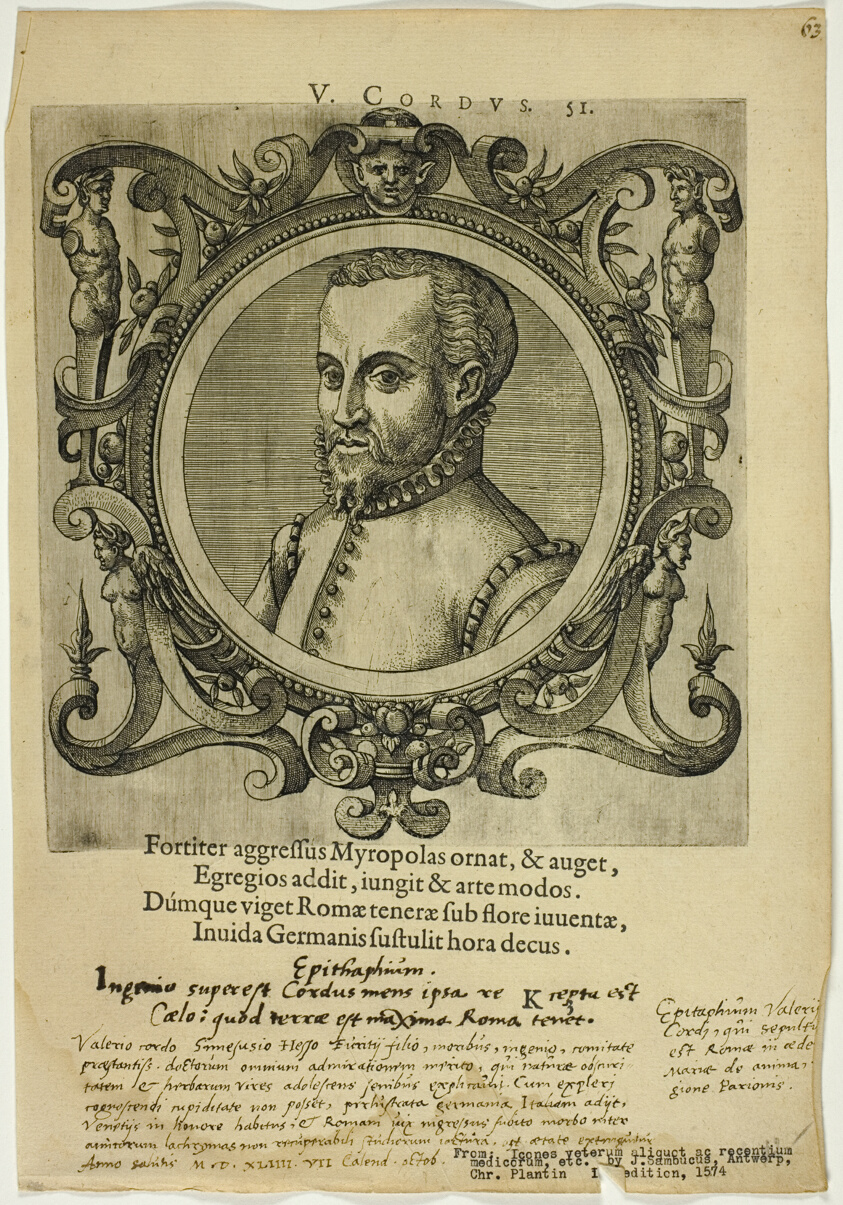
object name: Print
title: Portrait of V. Cordus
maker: Unknown Artist (Flemish); written by Johannes Sambucus (Flemish, 1531-1584)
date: published 1574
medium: Etching, with engraving, on cream laid paper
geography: Flanders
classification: etching; print; prints and drawing